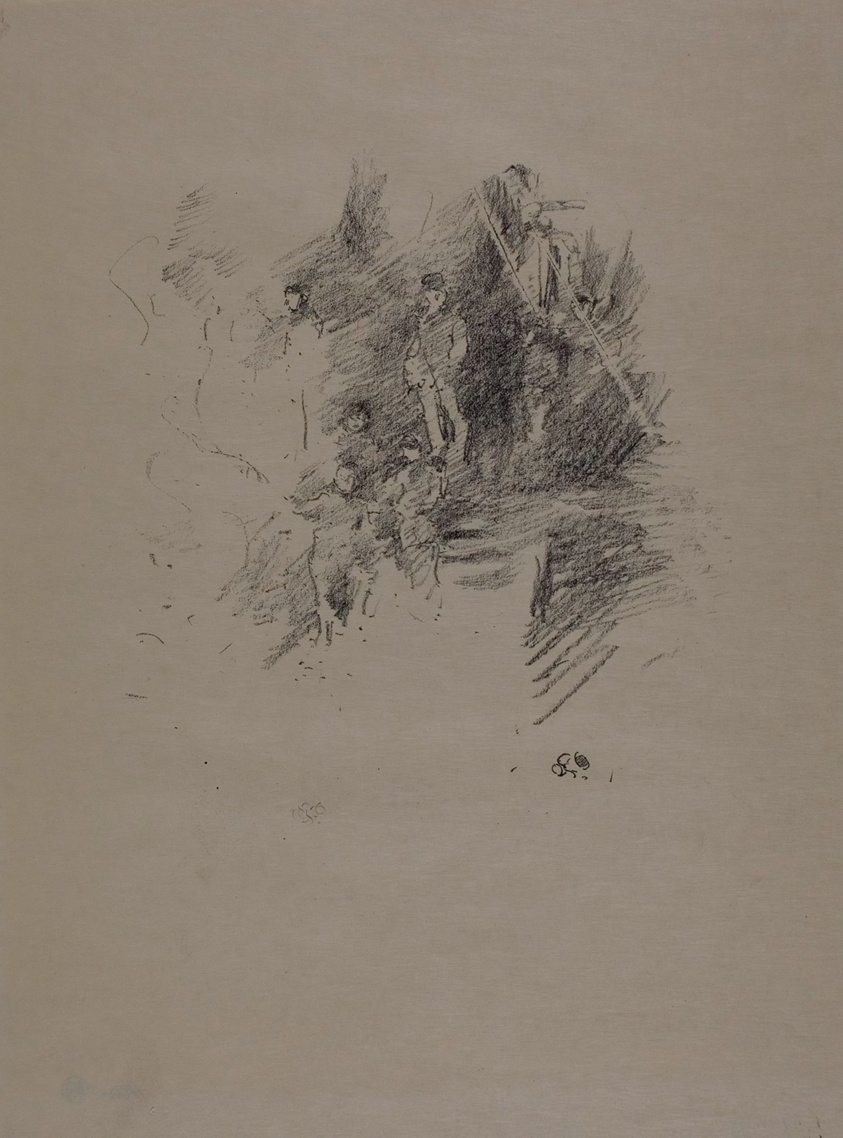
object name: Print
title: Fifth of November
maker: James McNeill Whistler (American, 1834-1903)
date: 1895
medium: Transfer lithograph in black on cream wove Japanese vellum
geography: United States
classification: transfer lithograph; lithograph; print; prints and drawing